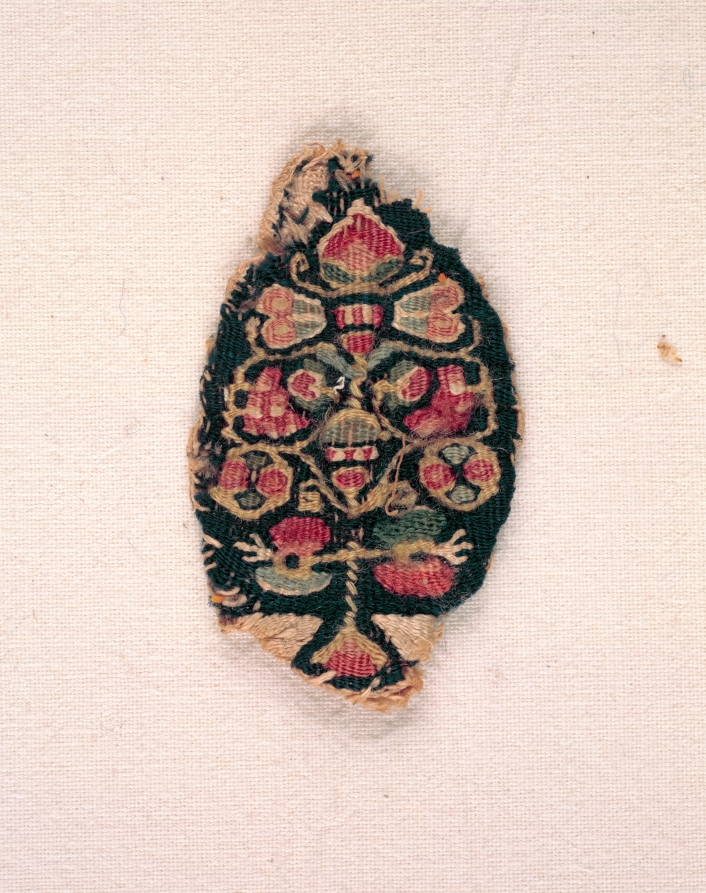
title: Pendant of a Clavus (?)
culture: Egypt, Byzantine period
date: 300s–500s CE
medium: tapestry weave: wool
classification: Textile